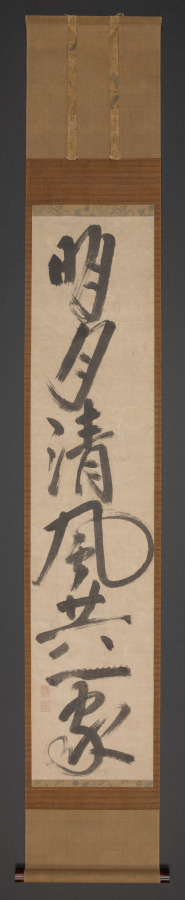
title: Single-column Calligraphy (Bright Moon and Fresh Breath as One . . . )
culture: Japan, Muromachi period (1392–1573)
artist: Motsurin Jōtō (Japanese, d. 1492)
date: 1400s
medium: hanging scroll; ink on paper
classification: Calligraphy